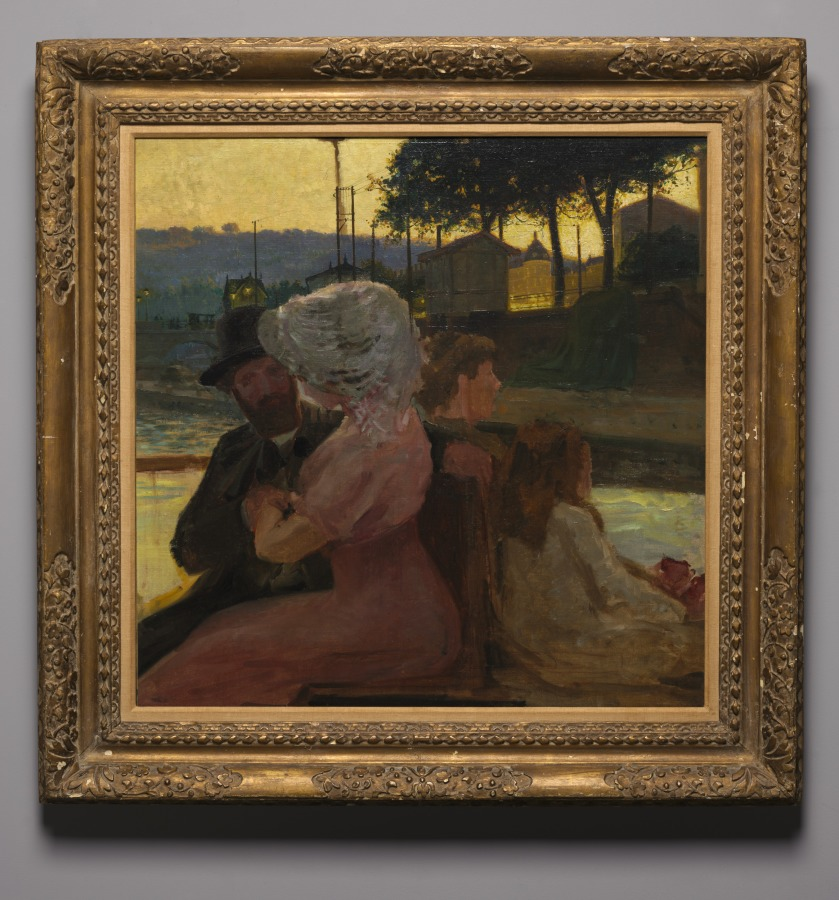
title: On the River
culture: France, late 19th-early 20th century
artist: attributed to Henri-Edmond Cross (French, 1856–1910)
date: c. 1900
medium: oil on canvas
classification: Painting